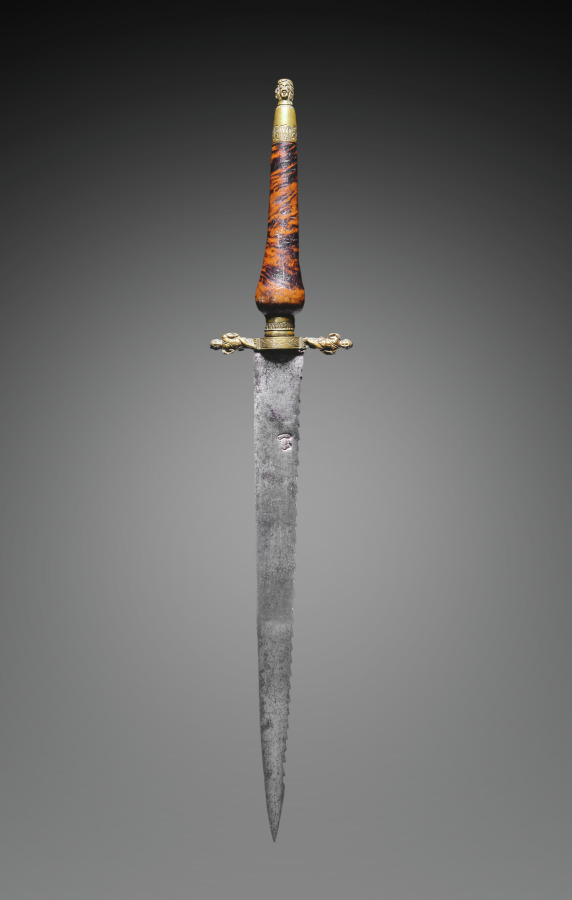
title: Officer's Plug Bayonette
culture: England, 17th century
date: c.1690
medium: steel serrated blade, brass, and wood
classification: Arms and Armor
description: Used increasingly in warfare during the 1600s, the plug bayonet was inserted into the muzzle of a gun to make a weapon with a long shaft. This eventually made the use of pikemen in warfare obsolete as the new musketeer could now continue after having run out of shots.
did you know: The owner's or maker's mark on this blade is unidentified.